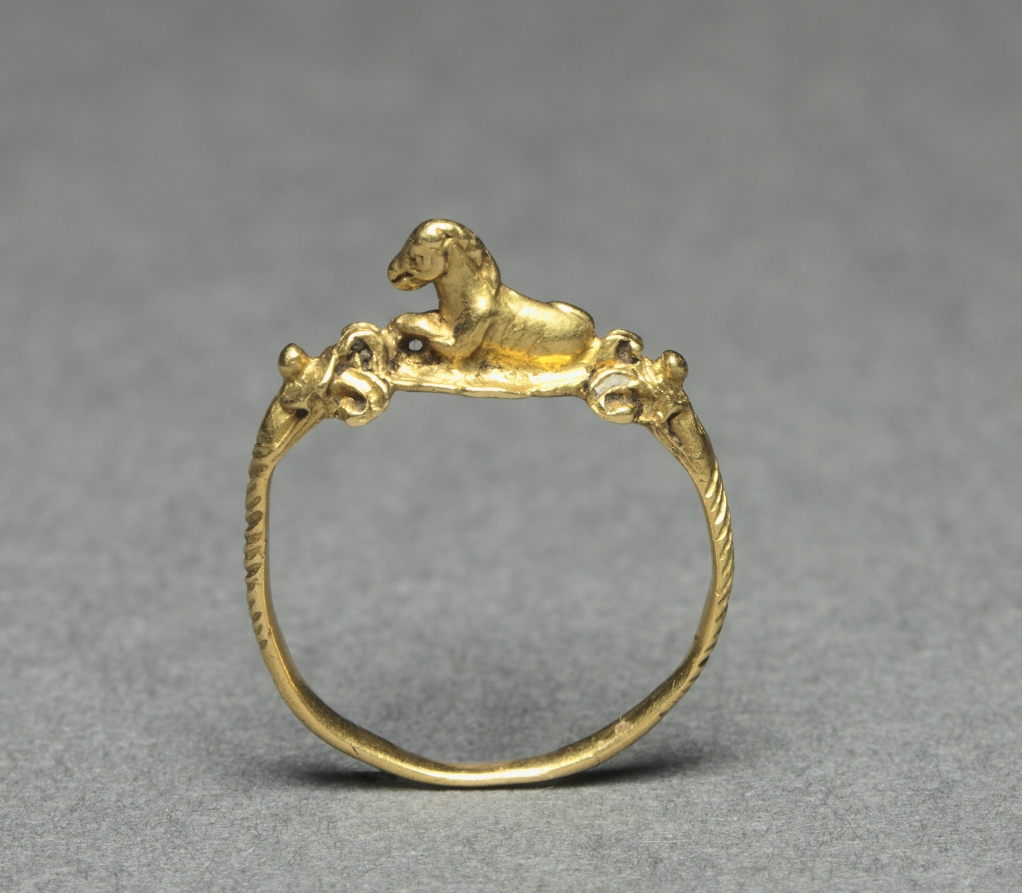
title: Ring with Hippocampus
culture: Italy, Roman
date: 100–200 CE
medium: gold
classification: Jewelry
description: This delicate gold ring is decorated with a tiny hippocampus, a creature from Greco-Roman mythology with the forequarters of a horse and the tail of a fish. Stylized waves bracket the hippocampus, crashing up against its tail and front hooves. The thin band of the ring is decorated with horizontal lines to the halfway point on both sides.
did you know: In Greek and Roman art, water spirits or nereids are often depicted riding hippocampi.